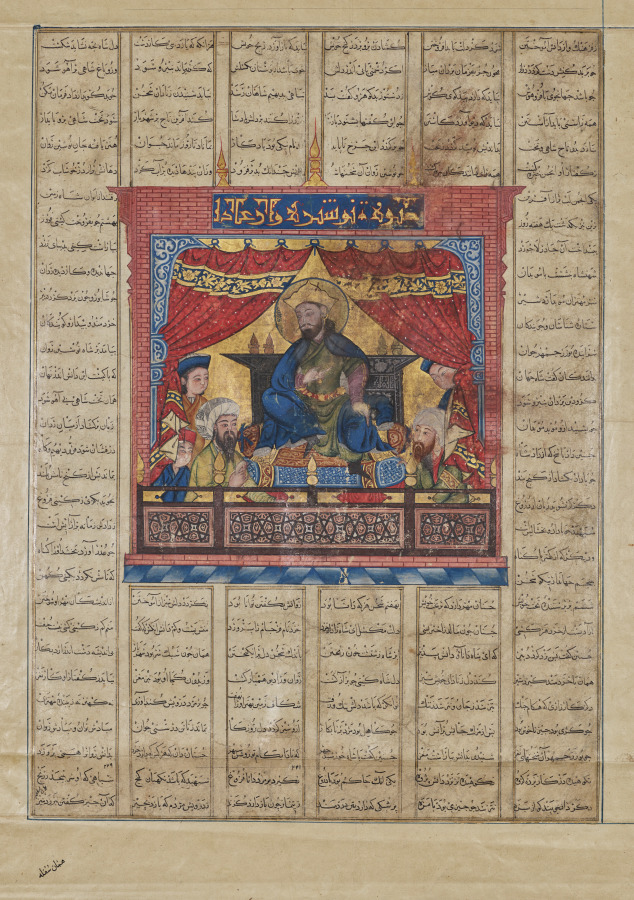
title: Portrait of Nushirwan the Just (verso) from a Shahnama (Book of Kings) of Firdausi (940–1019 or 1025)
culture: Iran, Tabriz, Ilkhanid period (1256-1353)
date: 1330–35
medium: opaque watercolor, ink, and gold on paper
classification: Manuscript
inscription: Script: Naskh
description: Mongol interest in the production of illustrated manuscripts eventually focused on Persian epic poetry. The Shahnama, a compilation of the epics and tales of Iran's legendary heroes, was a natural choice; the book included many subjects that suited Mongol taste, such as banquets, battles, hunting, and magical or fantastic events. Seated on the throne in the center of the painting is the Sasanian ruler of Iran, Khusraw I Anushirwan (531–579), descendant of Bahram Gur. Above the king's head an inscription reads, "Picture of Nushirwan the Just." The figure in the elaborate turban to the left of the king is probably the young Minister Buzurgmihr, famous for his wisdom and virtue. To celebrate the explanation of a troublesome dream by Buzurgmihr, Nushirwan held a series of seven banquets. The text around this painting describes the fifth banquet.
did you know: The symmetrical composition conveys the stability, balance, and restraint during the reign of King Nushirwan the Just.